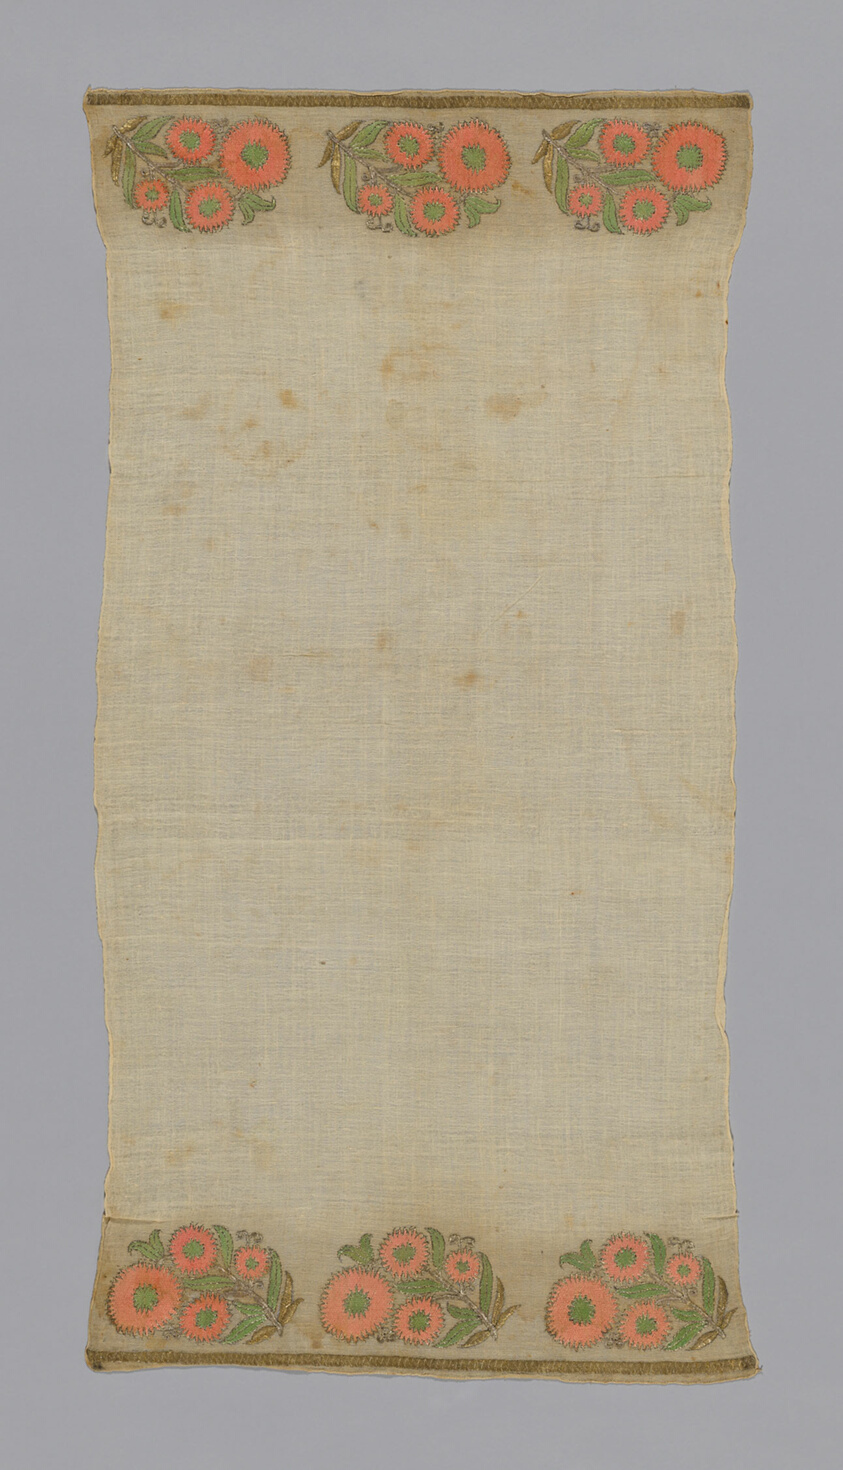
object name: Textile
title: Towel or Napkin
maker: Turkey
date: 19th century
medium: embroidered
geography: Turkey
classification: textile; needlework (visual works); weaving